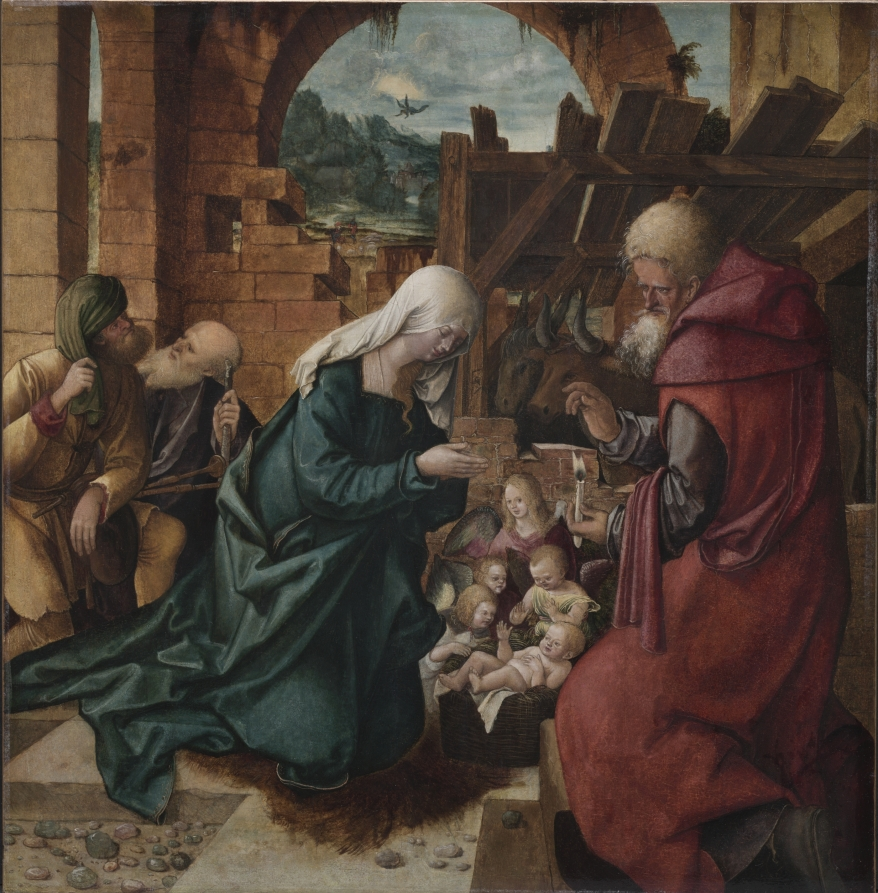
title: Adoration of the Shepherds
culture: Germany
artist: Hans Leonhard Schäufelein (German)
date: c. 1510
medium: oil on wood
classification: Painting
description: The artist has set Christ's birth in a ruined stable, witnessed by shepherds and angels. The candle Joseph holds symbolizes the supremacy of Christ's divine radiance over earthly light. Beyond the overgrown arch of the dilapidated structure an angel announces Christ's birth to shepherds in the field. Schäufelein based his picture on the Paumgartner Nativity, a painting (now preserved in Munich) by his teacher, Albrecht Dürer. Schäufelein was born in Nuremberg, probably studied under Wohlgemut, and then became the assistant of Dürer, whose style he imitated.